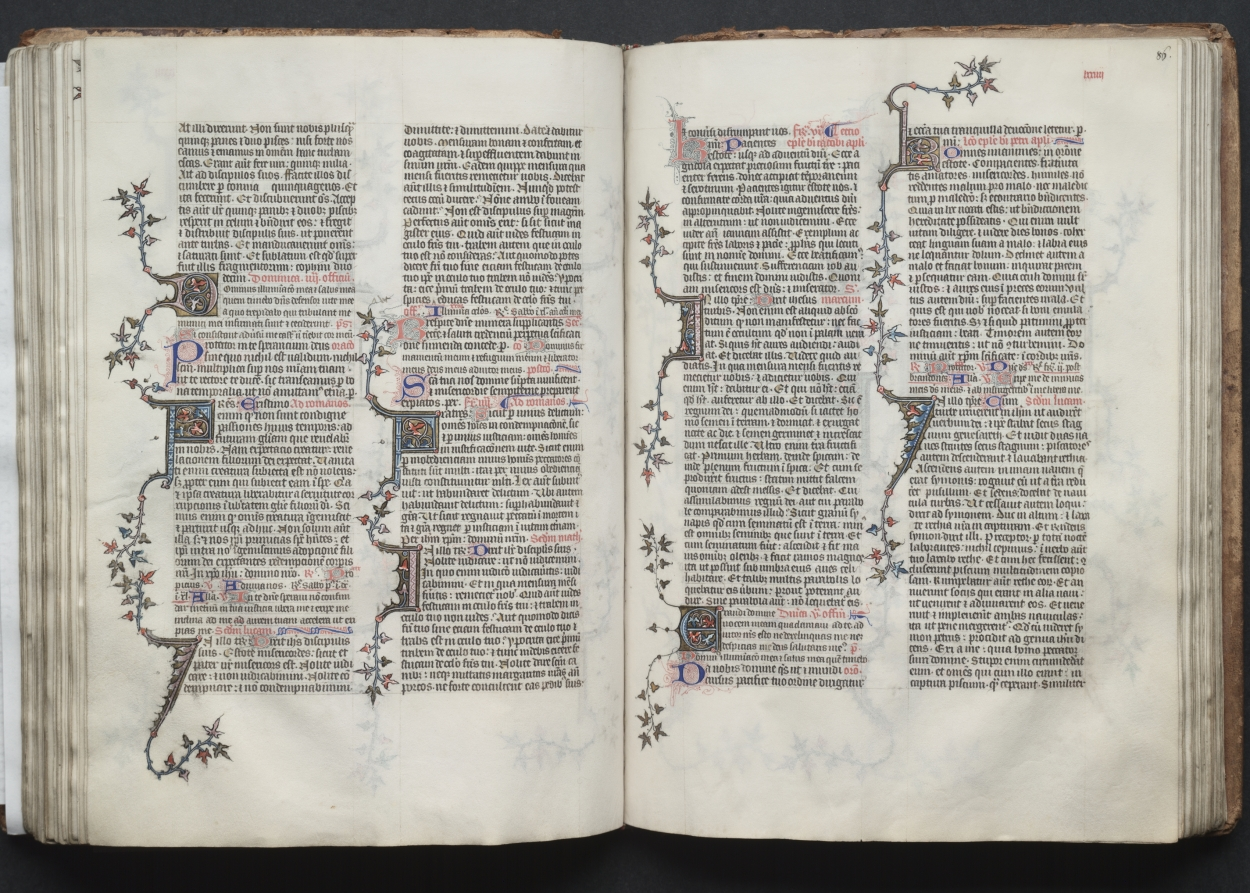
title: The Gotha Missal: Fol. 86r, Text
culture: France, Paris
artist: Master of the Boqueteaux (French)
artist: and Workshop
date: c. 1375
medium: ink, tempera, and gold on vellum; blind-tooled leather binding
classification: Bound Volume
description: The style and quality of this manuscript's decoration is typical of deluxe Parisian books made for aristocratic or royal patrons. Most of the book's decoration appears to be the work of the Master of the Boqueteaux, an artist active at the court of King Charles V (died 1380). His style was apparently shared by a number of book illuminators working in and around Paris. It is very possible that the Gotha Missal belonged to Charles V, but is not provable because the manuscript has no royal portraits and lacks a colophon. Given the book's magnificent decoration, however, it would seem that it was produced for a Valois prince, if not for the king himself. The manuscript receives its name from the German dukes of Gotha, its later owners.